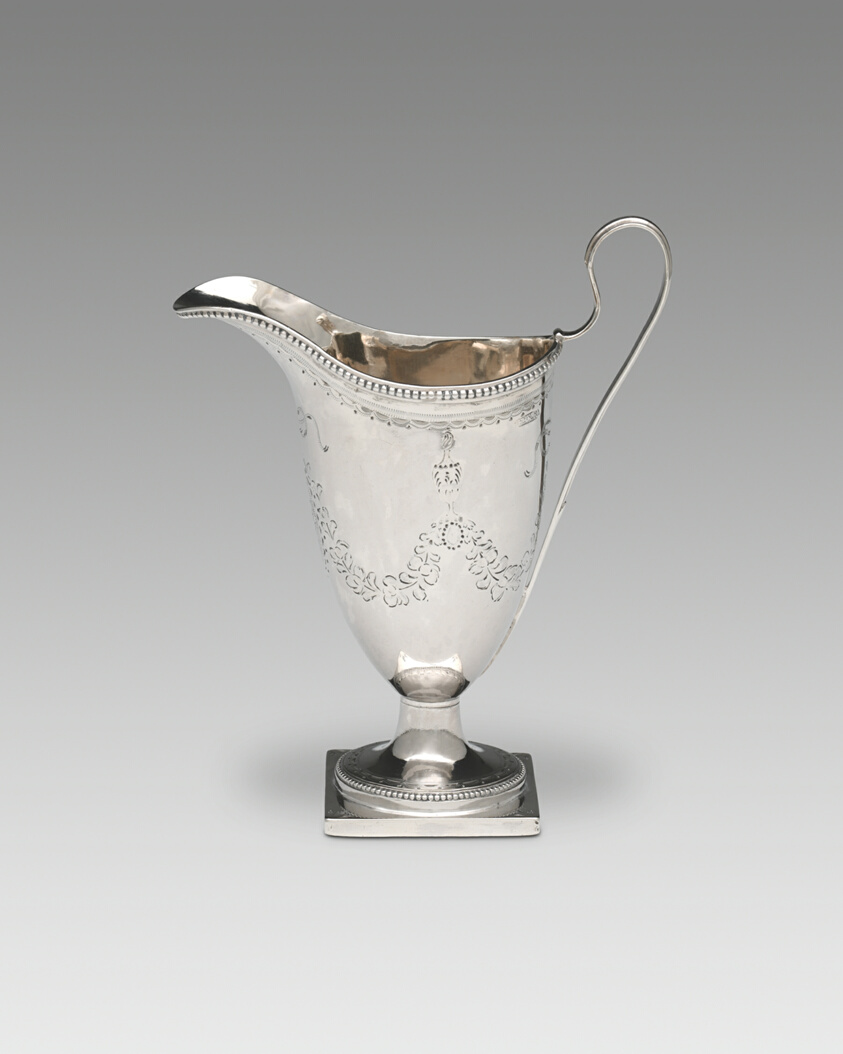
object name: Metalwork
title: Milk Pot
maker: Paul Revere Jr.; American, 1734–1818; Boston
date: 1784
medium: Silver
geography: Boston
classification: creamer; silver; american decorative arts; american arts; decorative arts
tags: dining, drinking